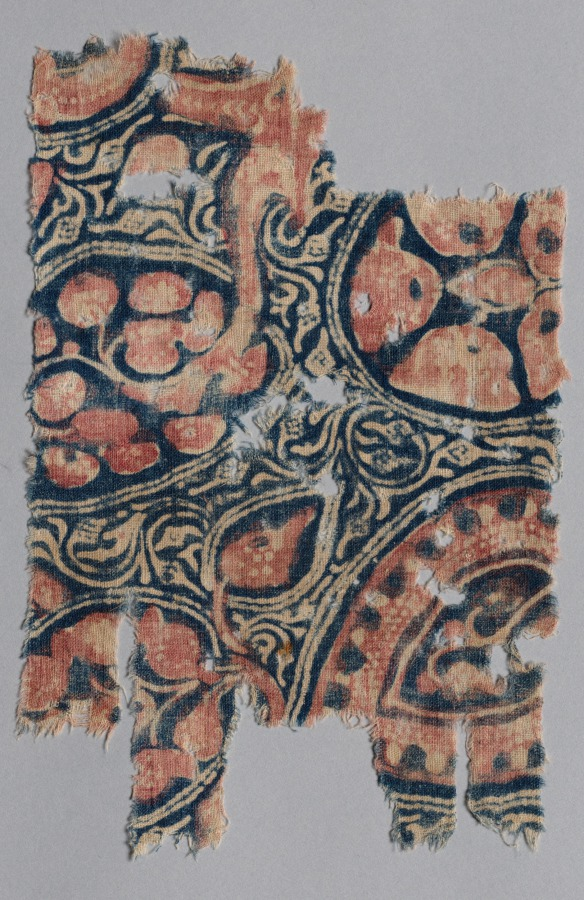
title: Fragment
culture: India, 15th century (?)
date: 1400s (?)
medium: applied resist, painted mordant, dyed; cotton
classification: Textile